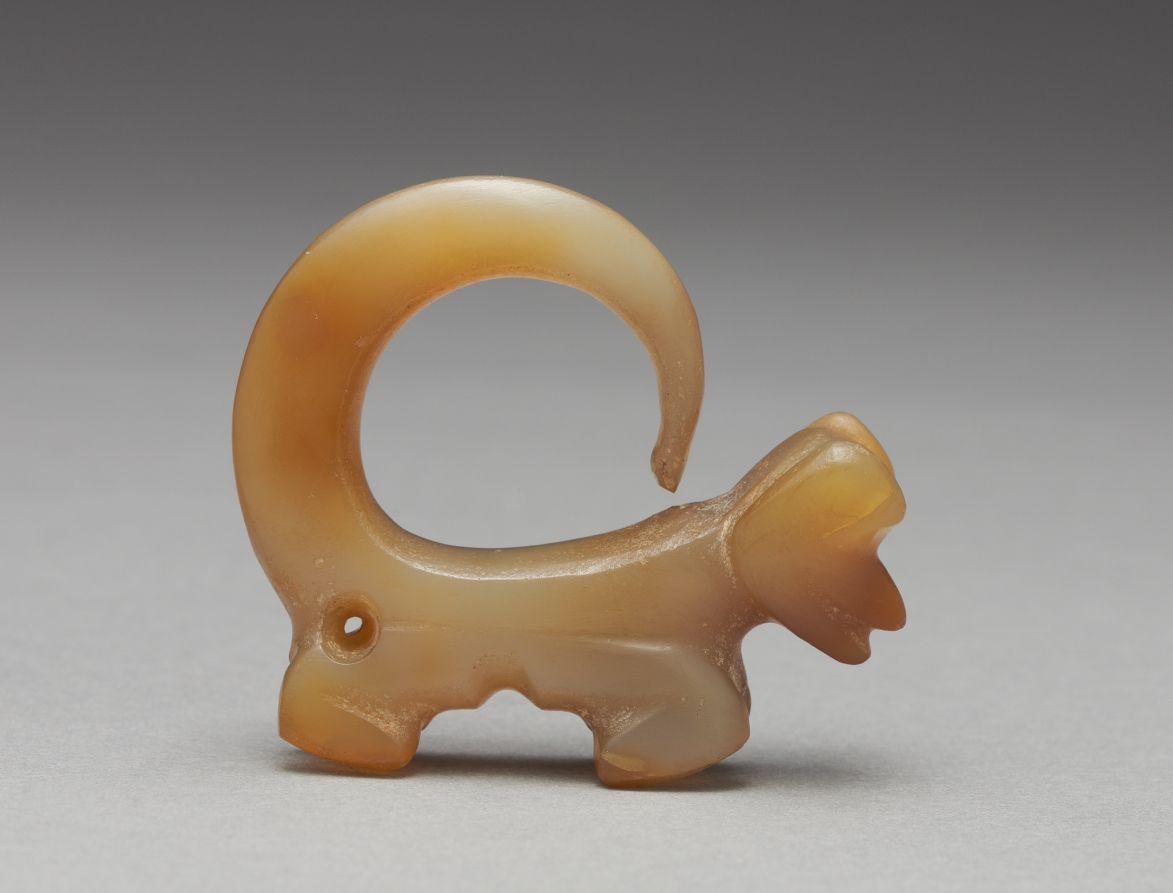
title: Curly-Tailed Animal Pendant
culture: Panama, Initial style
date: 100–800 CE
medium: agate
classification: Sculpture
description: A favored Initial-style subject is a charming animal whose curly tail-its most impressive feature-may derive from a monkey's. Its other traits vary considerably, causing it to be identified as everything from a dog to a duck. Initial-style gold ornaments represent Panama's oldest metalwork. Since metal technologies appeared suddenly and fully developed in Panama, it is likely that they were introduced from the outside, probably from Colombia to the south.